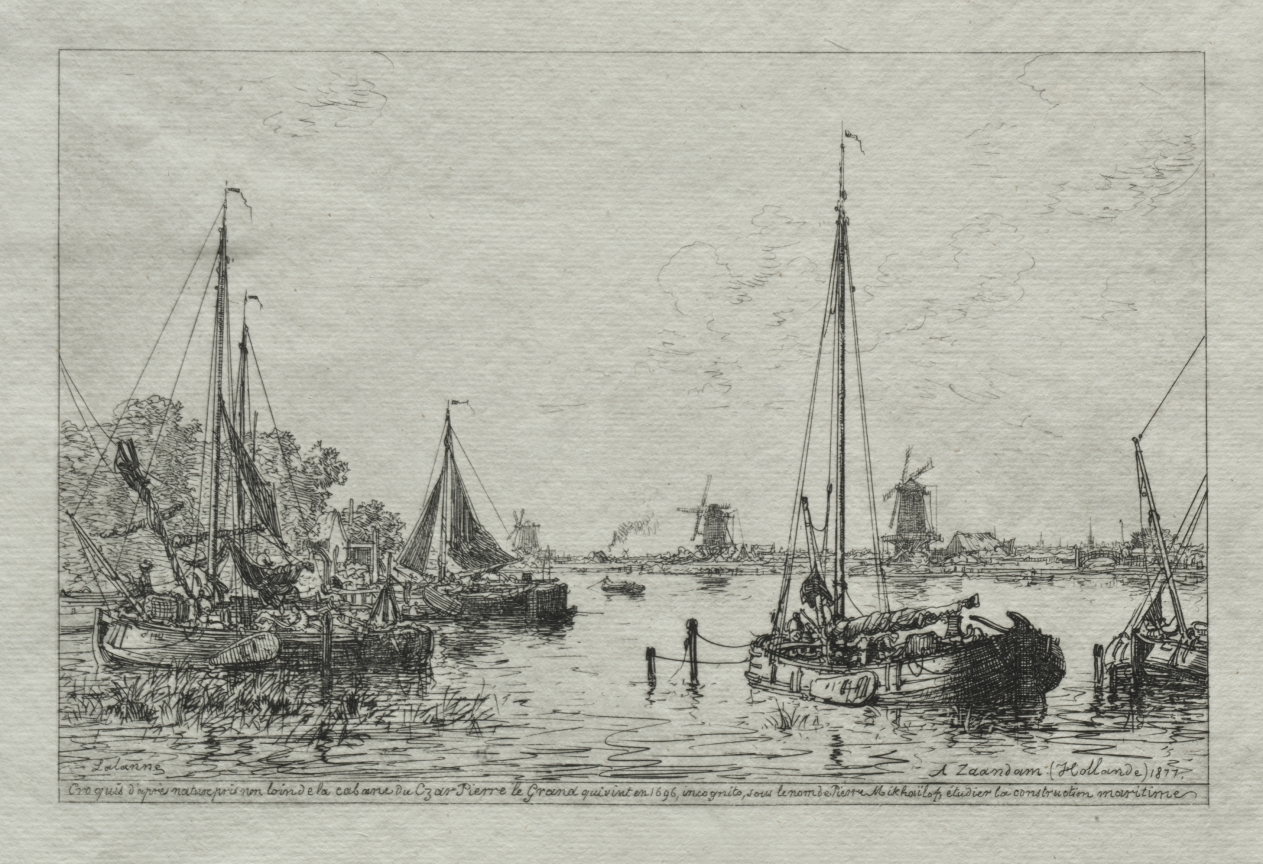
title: Sketch from Nature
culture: France, 19th century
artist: Maxime Lalanne (French, 1827–1886)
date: 1877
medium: etching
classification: Print